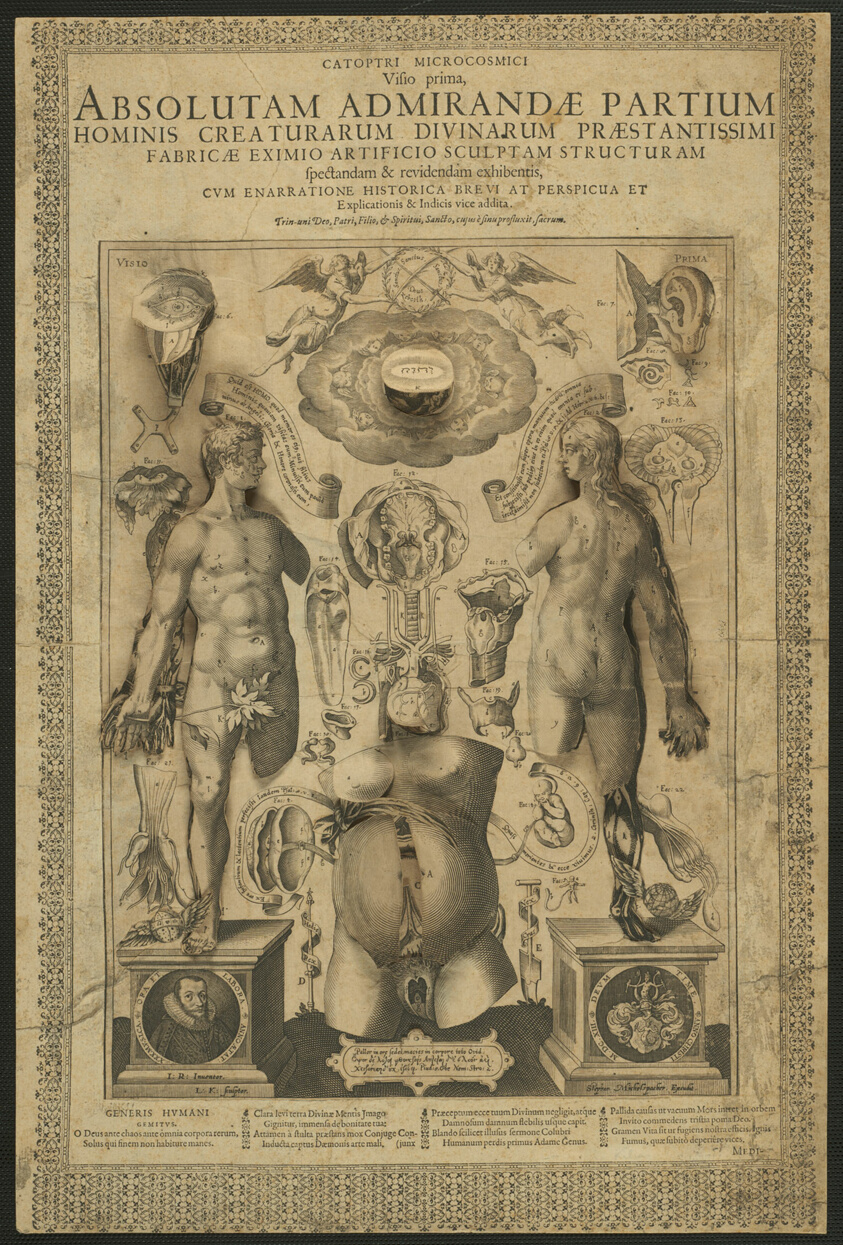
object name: Print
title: First Vision, from Mirrors of the Microcosm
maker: Lucas Kilian (German, 1579-1637)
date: 1613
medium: Engraving on ivory laid paper (discolored to buff), cut, with etching on ivory laid paper components, laid down on letterpress printed ivory laid paper, and mounted onto cream wove paper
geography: Germany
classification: engraving; print; prints and drawing